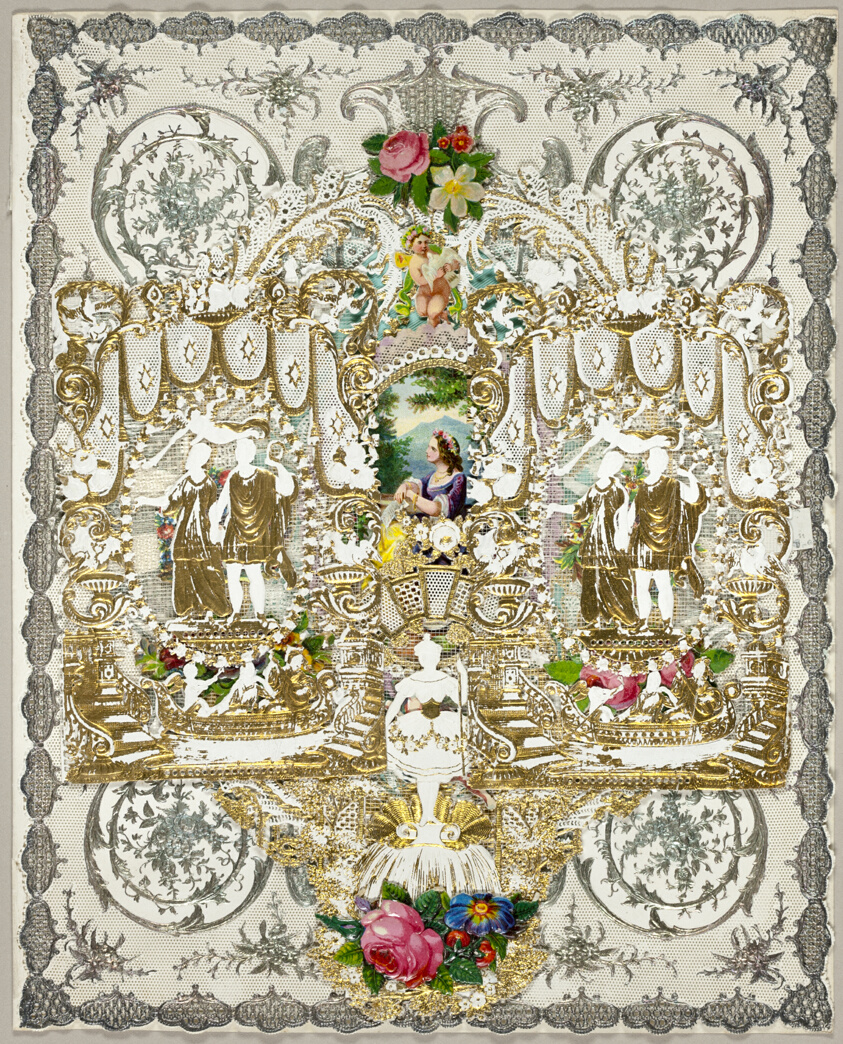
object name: Drawing and Watercolor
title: Untitled Valentine (Woman Holding Letter)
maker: Unknown Artist; English, 19th century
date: c. 1850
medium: Gold and silver paint and collaged elements on cut and enbossed paper (lace)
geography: England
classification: valentine; prints and drawing; paper